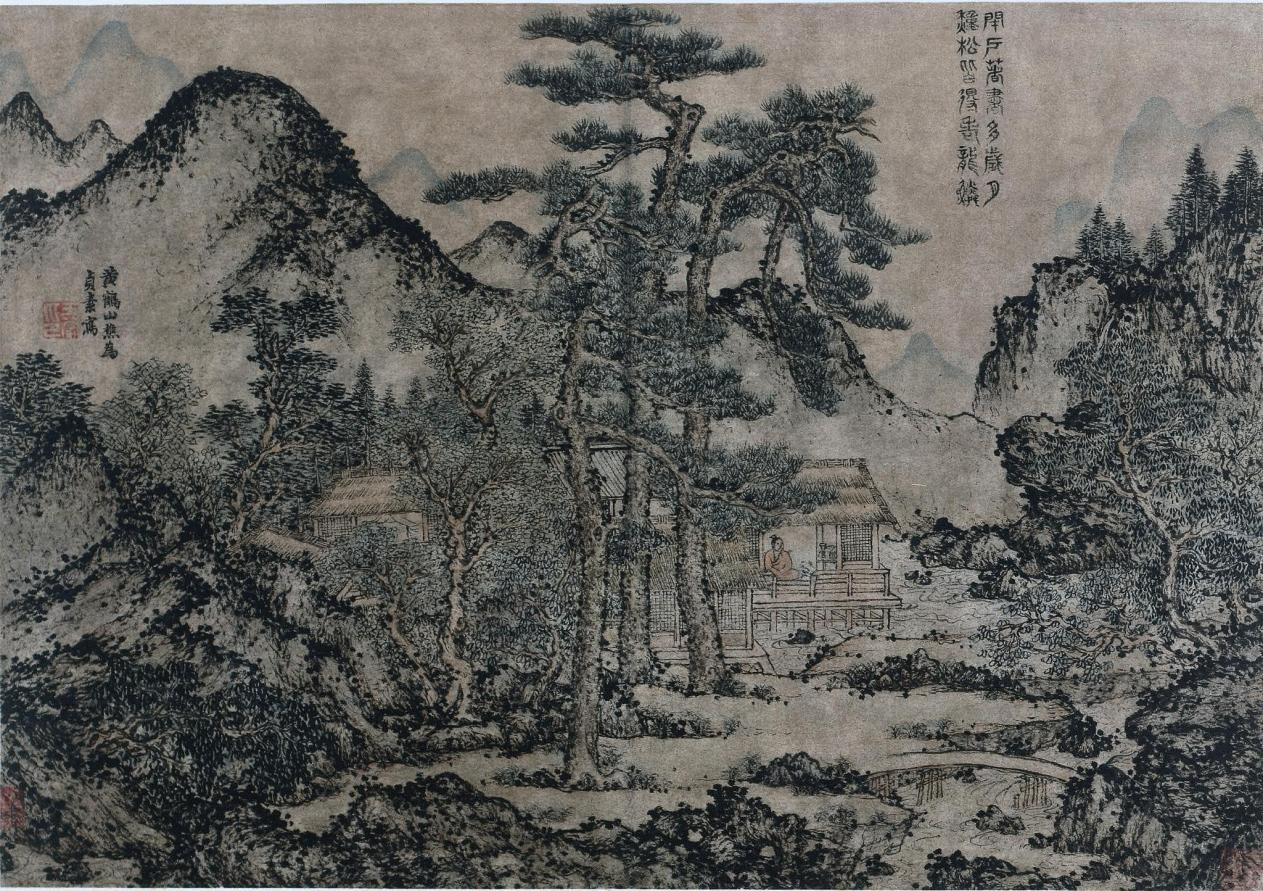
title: Writing Books under the Pine Trees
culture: China, Yuan dynasty (1271-1368)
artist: Wang Meng (Chinese, c. 1308–1385)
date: c. 1308–85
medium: Album leaf; ink and color on paper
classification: Painting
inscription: Artist's inscription, signature, and seal: Many years and months passed by the locked gate/ Behind which the scholar has been immersed in writing his books;/ While the pine trees he had planted/ Have all grown up with old dragon scales./ The Yellow Crane Mountain Woodcutter [Huang-ho-shan-ch'iao] painted this for Chen-su [the hao of Ts'ao Chih-po]. [seal] Wang Meng yin.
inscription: 2 additional seals: 1 of Ts'ao Chih-po (1271–1355); 1 unidentified.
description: Wang Meng, born into a distinguished family in Wuxing (modern Huzhou), Zhejiang province, was the maternal grandson of Zhao Mengfu (1254–1322). Aside from intermittent political commitments under the foreign Mongol and Ming governments, Wang dedicated most of his life to retirement, as conveyed in this painting. By the 1360s, when the Red Turbans began to rebel against the Yuan dynasty leaders, and the Mongols gradually lost control over Jiangnan, Wang Meng withdrew into the mountains north of Hangzhou, calling himself Woodcutter of Yellow Crane Mountain. In the early years of the Ming dynasty, Wang was caught up in a purge and died in prison.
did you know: Wang Meng wrote the inscription at the right in classical seal script and applied his signature and seal on the left side of the composition.